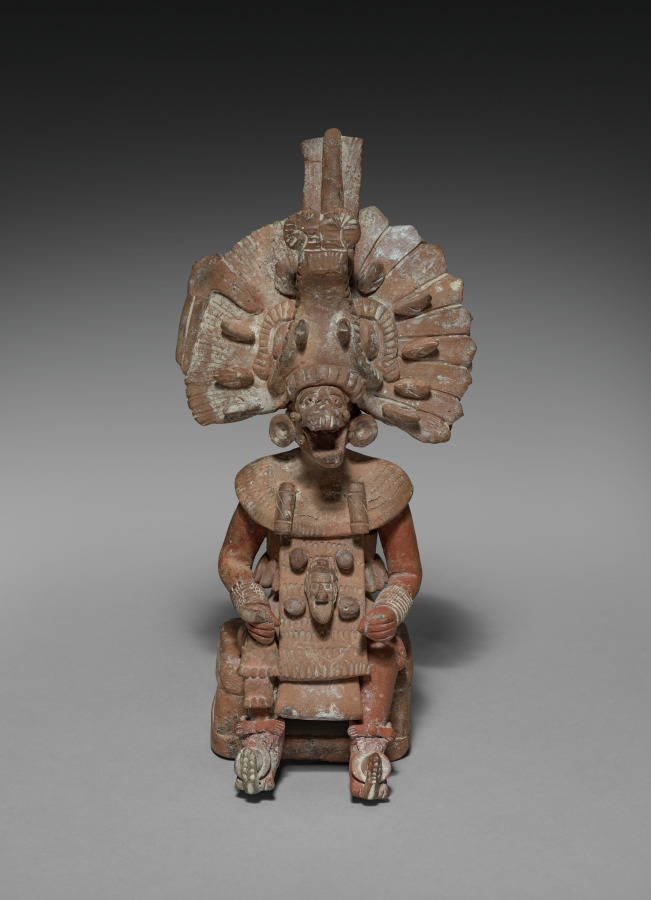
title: Seated Lord with Removable Headdress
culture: Mesoamerica, Maya, probably Jaina Island, Late Classical period, 7th-9th century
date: 600–800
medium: ceramic and slip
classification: Ceramic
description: The major Maya grave offerings on Jaina Island were ceramic figurines that depict deities and humans in a variety of roles. The standing figure represents a warrior who once probably held weapons and wears either quilted cotton armor or the feathered uniform of a military order. The seated figure also represents a male, perhaps another warrior, who wears a huge zoomorphic headdress. A skeletal face with articulated jaw descends from the headdress to fit as a mask over the figure’s face.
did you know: It is estimated that some 20,000 people were buried on the tiny island of Jaina over a 500-year period.